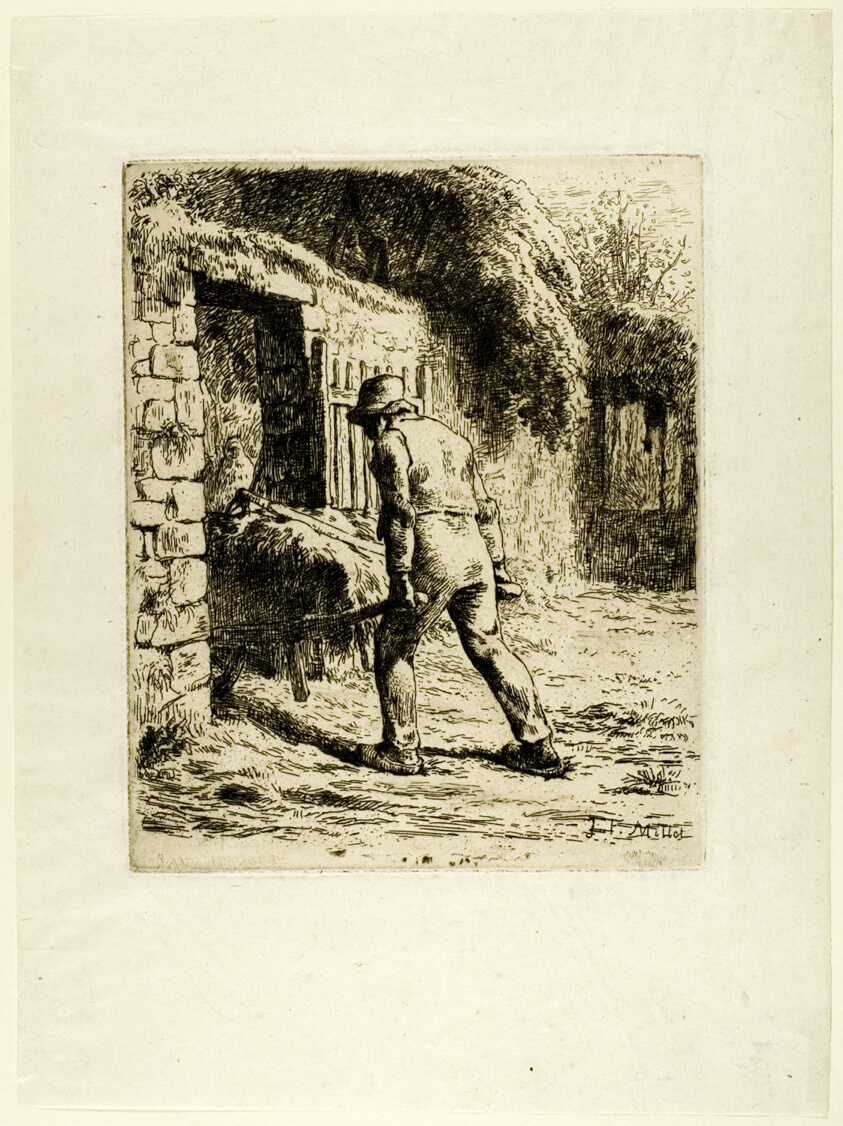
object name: Print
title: Peasant with a Wheelbarrow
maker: Jean François Millet (French, 1814-1875); printed by Auguste Delâtre (French, 1822-1907)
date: 1855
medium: Etching and drypoint on ivory wove China paper hinged on two sides to cream wove card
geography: France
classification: etching; print; prints and drawing